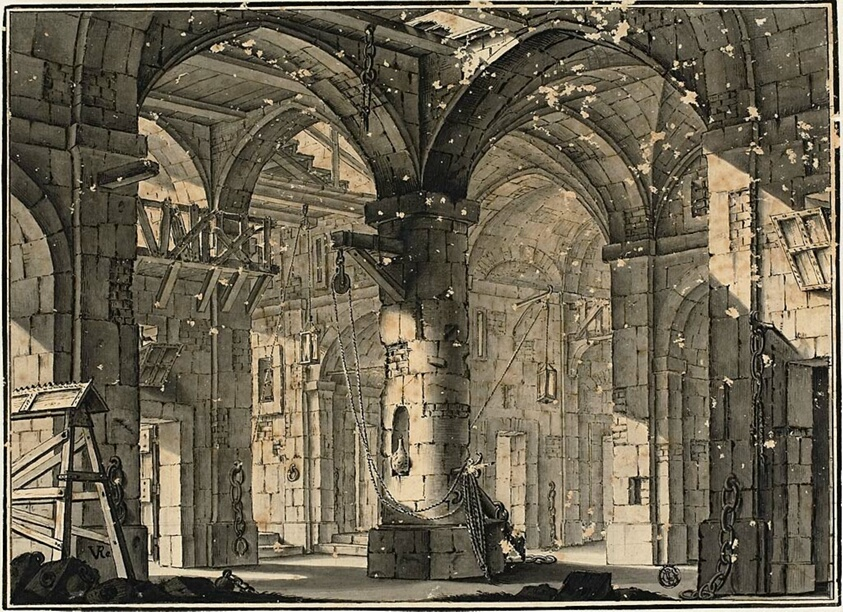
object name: Drawing and Watercolor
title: Prison Scene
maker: Attributed to Vincenzo dal Re; Italian, died 1762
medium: Pen and black ink, with brush and black wash, over traces of black chalk, on ivory laid paper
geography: Italy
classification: ink or chalk wash; drawings (visual works); prints and drawing